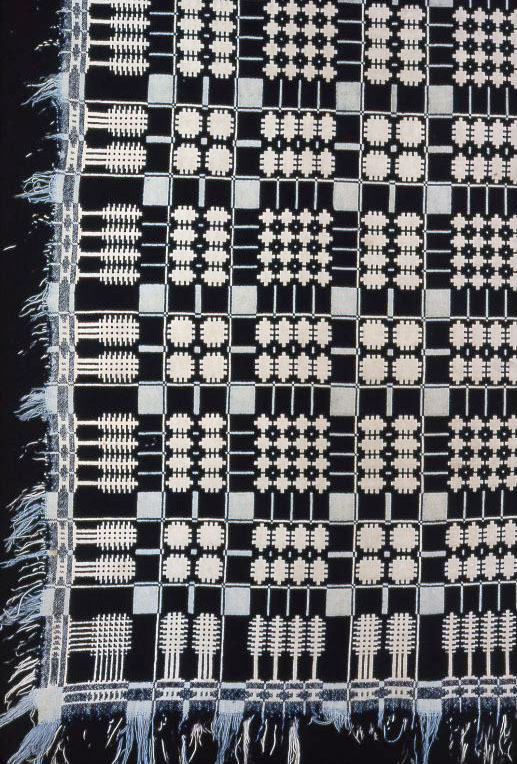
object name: Textile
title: Coverlet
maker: United States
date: 1830/40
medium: Cotton and wool, plain weave double cloth; woven on loom with Jacquard attachment; two loom widths joined; fringed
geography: United States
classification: textile; coverlet; weaving - coverlet; weaving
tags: coverlet